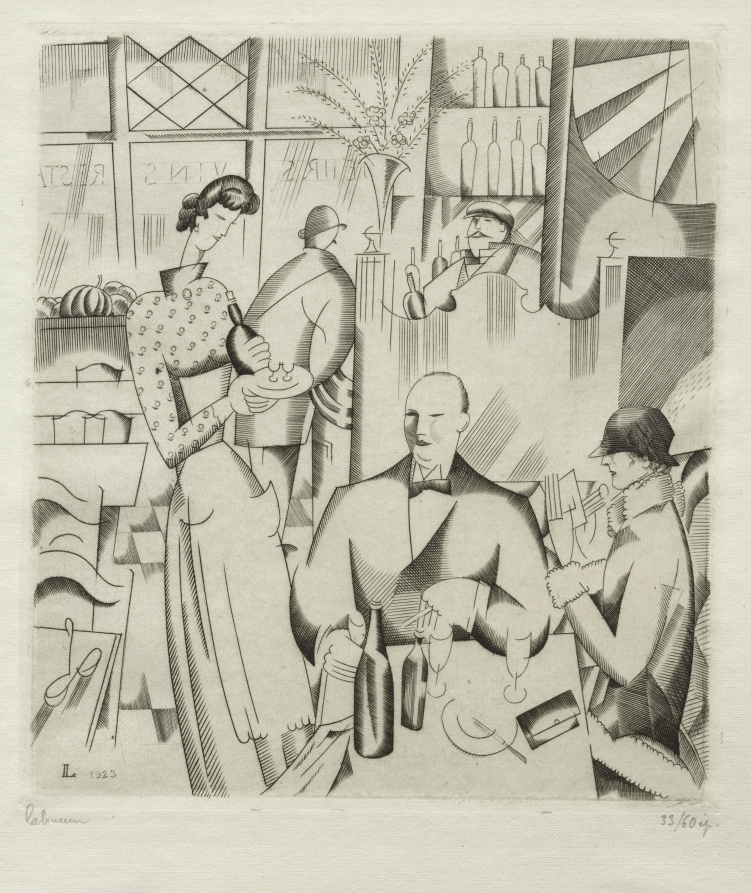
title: Dinner at the Bistro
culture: France, 20th century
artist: Jean-Émile Laboureur (French, 1877–1943)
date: 1923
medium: engraving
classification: Print